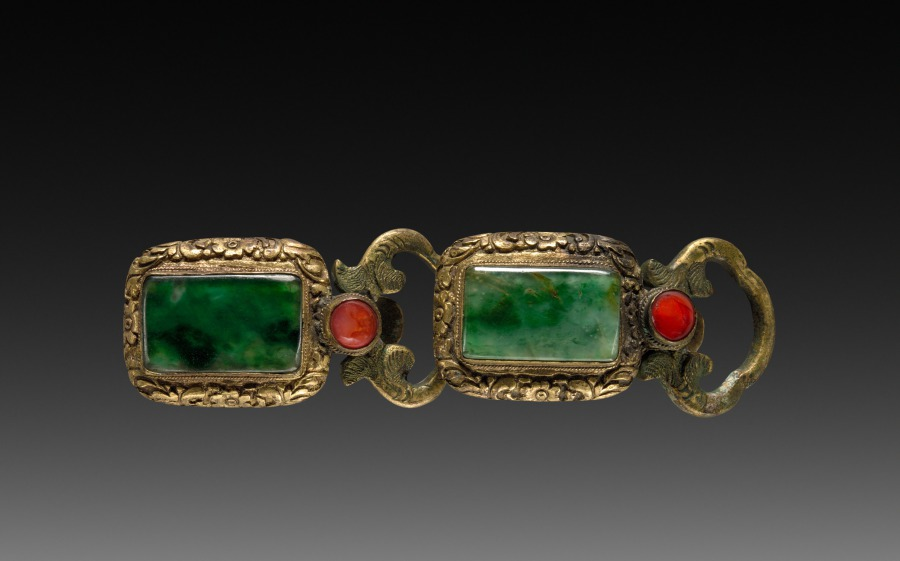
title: Buckle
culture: China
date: 1900s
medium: brass, engraved and set with jade and carnelian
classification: Jewelry